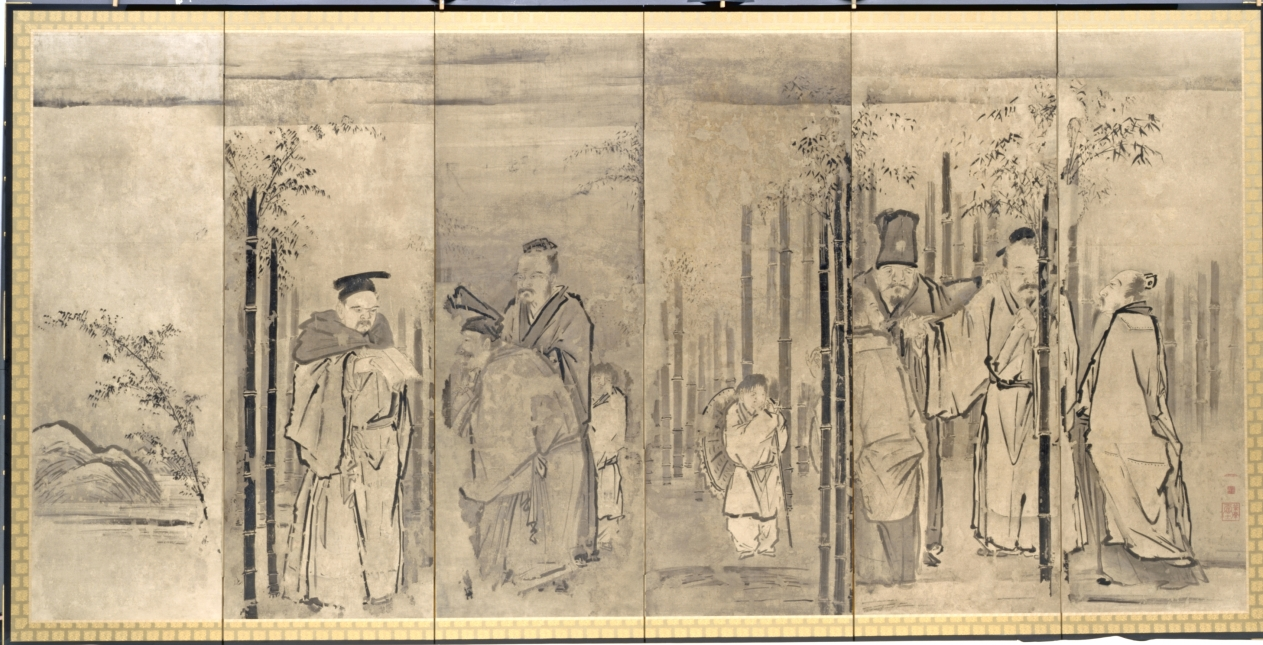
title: Seven Sages of the Bamboo Grove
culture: Japan, Edo period (1615–1868)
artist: Kano Tan’yū (Japanese, 1602–1674)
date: 1600s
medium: pair of six-fold screens; ink on paper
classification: Painting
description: The Kano school was a group of professional artists patronized by the shogun from the late Muromachi period to the Edo period. The group adopted themes of reclusiveness to convey the importance of loyalty to the shogunate. A leader of the Edo Kano school, Kano Tanyu paired Seven Sages of the Bamboo Grove and Four Elders of Mt. Shang to reference a painting of the same theme attributed to Kano Motonobu. Seven Sages of the Bamboo Grove refers to the elites who escaped the social chaos of China’s Wei-Jin period (AD 200s–400s); they fled to a secluded bamboo grove where they could express themselves freely, enjoying pure conversation, music, and wine. The other screen, Four Elders of Mt. Shang, depicts the scholars who left the turbulence of the late Qin dynasty to pursue their scholarly interests in seclusion on Mt. Shang in Shanxi province.